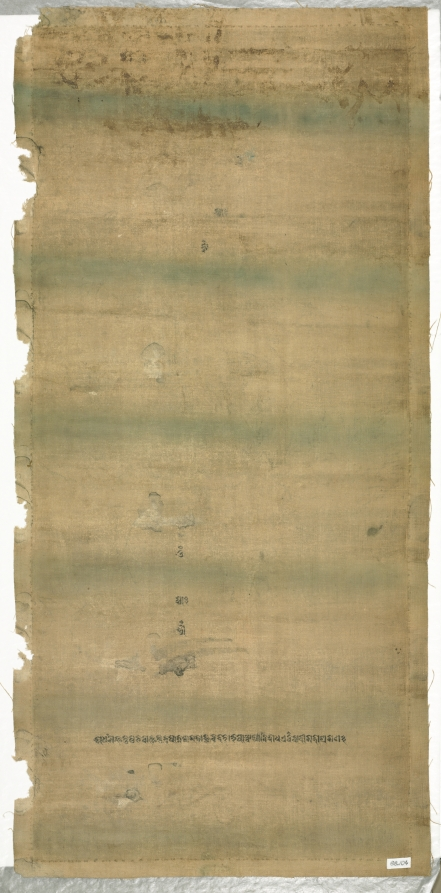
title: Lohans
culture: Sino-Tibetan, Yuan dynasty (1271-1368)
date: c. 1300–1350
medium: color and gold on cotton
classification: Painting